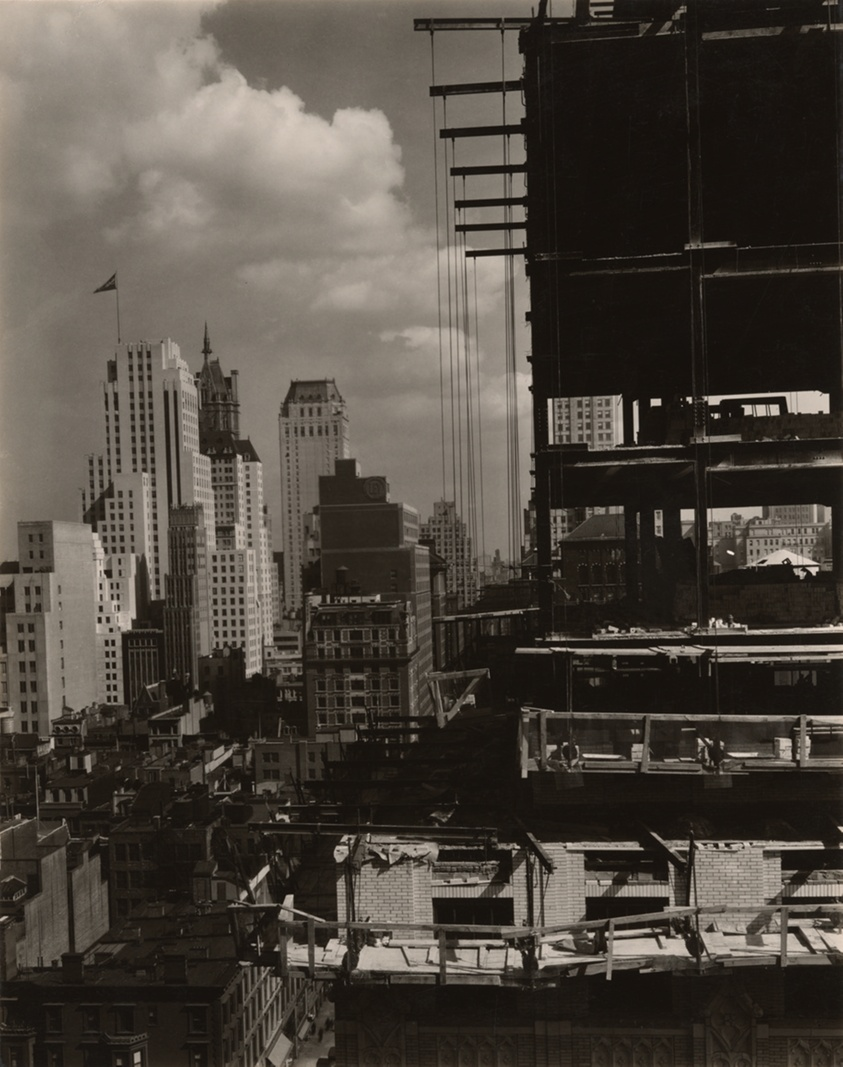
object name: Photograph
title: From My Window at An American Place, North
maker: Alfred Stieglitz (American, 1864–1946)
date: 1931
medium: Gelatin silver print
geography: United States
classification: gelatin silver (developing-out-paper) pr; photographic process; photography; photograph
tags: cityscapes